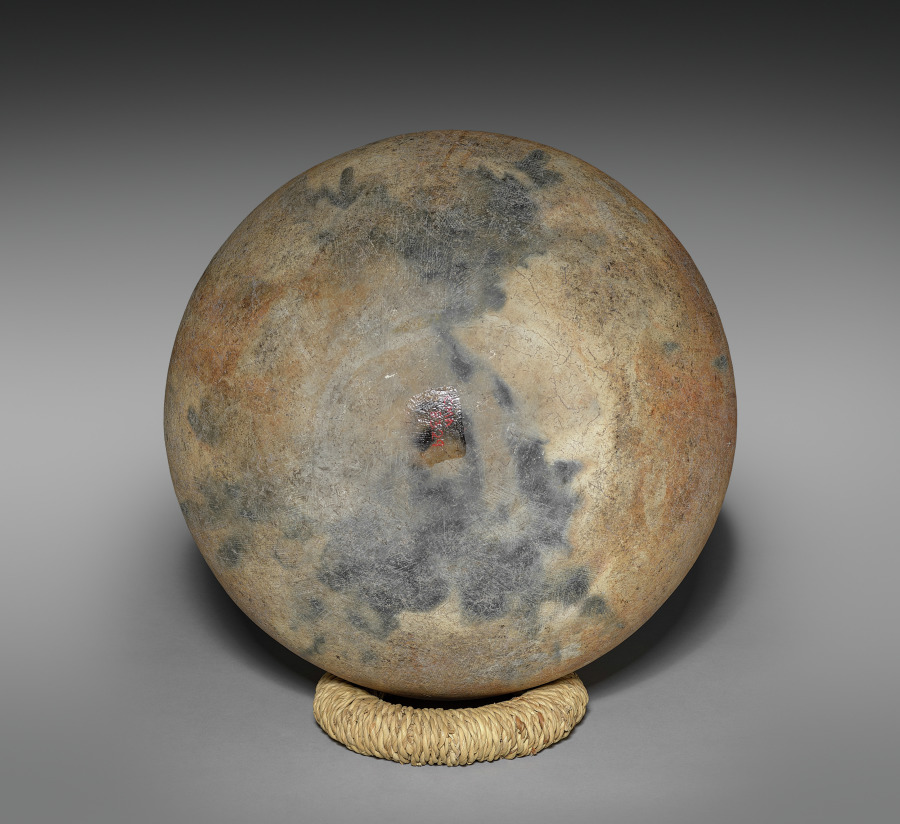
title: Jar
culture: Thailand, Ban Chiang, Neolithic Period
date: 3000s BCE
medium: reddish earthenware with painted decoration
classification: Ceramic